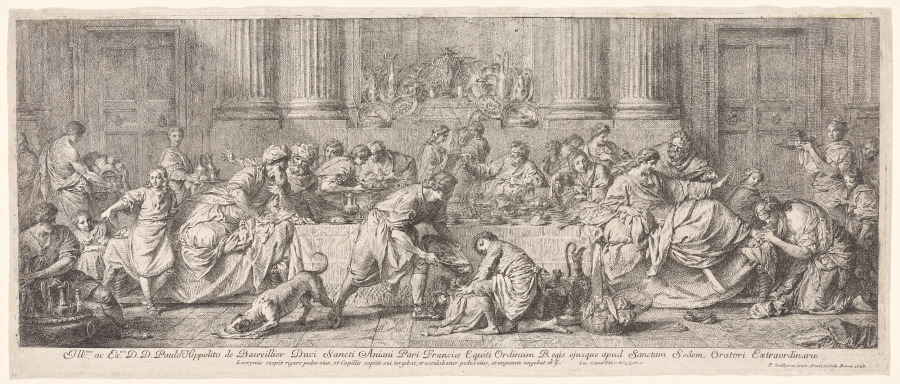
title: The Banquet in the House of Simon the Pharisee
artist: Pierre Subleyras (1699–1749)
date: 1738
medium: Etching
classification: Print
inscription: Watermark: fleur-de-lis in a single circle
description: Subleyras based this etching on his own painting of the same subject, commissioned by the Order of Saint John Lateran for the dining room of their monastery in Asti, Italy. The lively banquet scene includes an episode from the Gospel of Luke in which Simon the Pharisee, a Jewish religious leader, invites Christ to have dinner with him. During the meal, a notoriously sinful woman enters the feast, washes Christ’s feet with her tears, and dries them with her hair. Subleyras placed Christ and the woman at the far right end of the table, where Simon leans over them, wondering why Christ would let a sinful woman touch him.